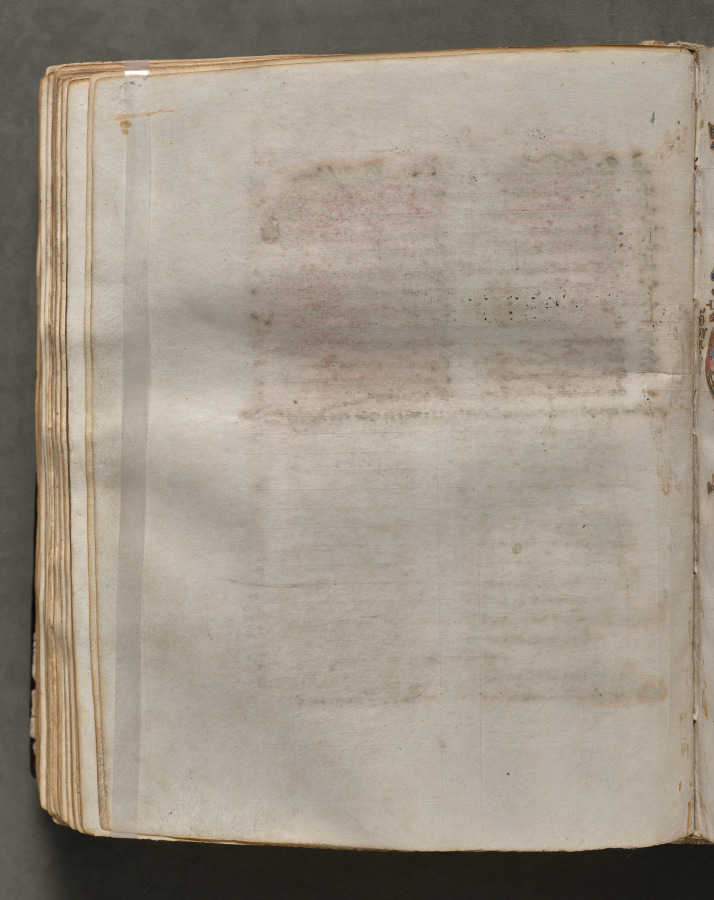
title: Text, folio 199 (verso), from a Gospel Book with Commentaries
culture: Byzantium, Constantinople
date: c. 1000–1100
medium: ink, tempera, and gold on vellum; leather binding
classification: Bound Volume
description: Each of the four gospels in this book opens on a page with brilliantly illuminated borders depicting the author of the text as well as birds-principally peacocks, symbols of the immortality of the soul-and fountains, representing the fountain of life and the salvation of the soul. This volume consists of 428 leaves with texts in Greek. Its level of sophistication suggests that it was probably written and decorated in a monastery in Constantinople.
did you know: Gospel Books were carried in procession through Byzantine churches.